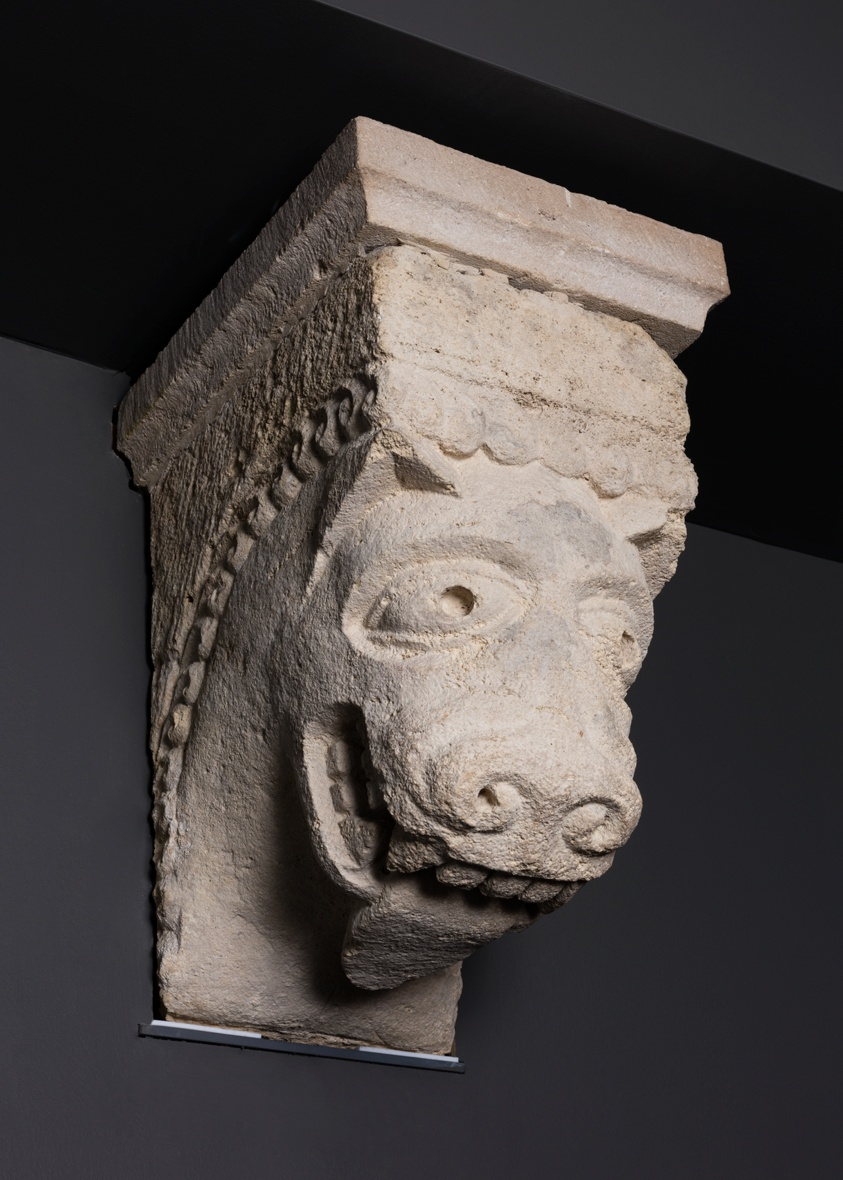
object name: Sculpture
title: Corbel with Animal Mask with Protruding Tongue from the Monastery Church of Notre-Dame-de-la-Grande-Sauve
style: medieval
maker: French; Aquitaine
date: 1150/1200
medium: Limestone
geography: France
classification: sculpture; architectural detail; architectural fragment; architecture; fragment; france; french; limestone; sculpture/stone; stone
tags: corbel, animals, architechture, architectural, architectural detail, architectural fragment, architectural fragments, architecture, architecture, masks